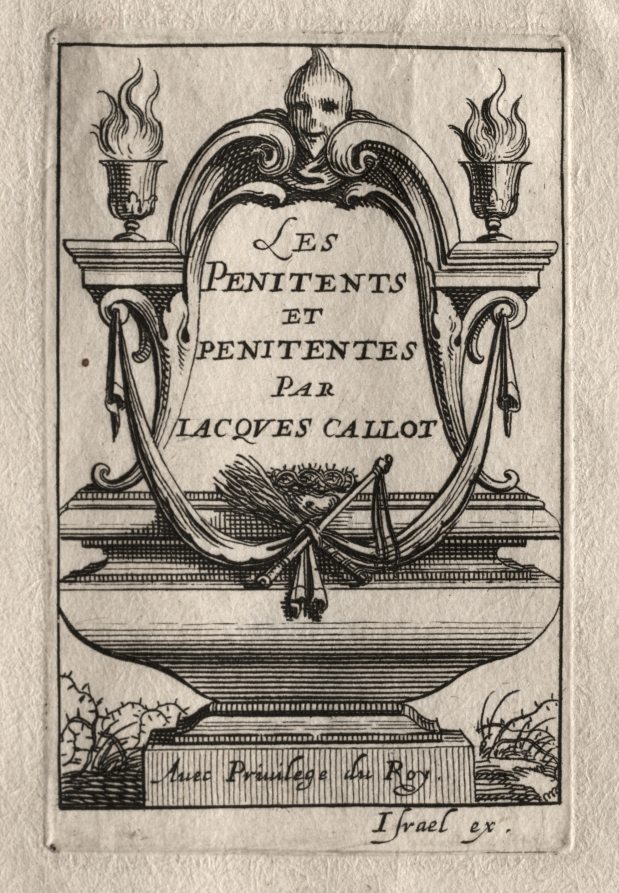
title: Les Penitents: Frontispiece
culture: France, 17th century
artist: Abraham Bosse (French, 1602–1676)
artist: Jacques Callot (French, 1592–1635)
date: ca. 1632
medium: etching and engraving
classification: Print